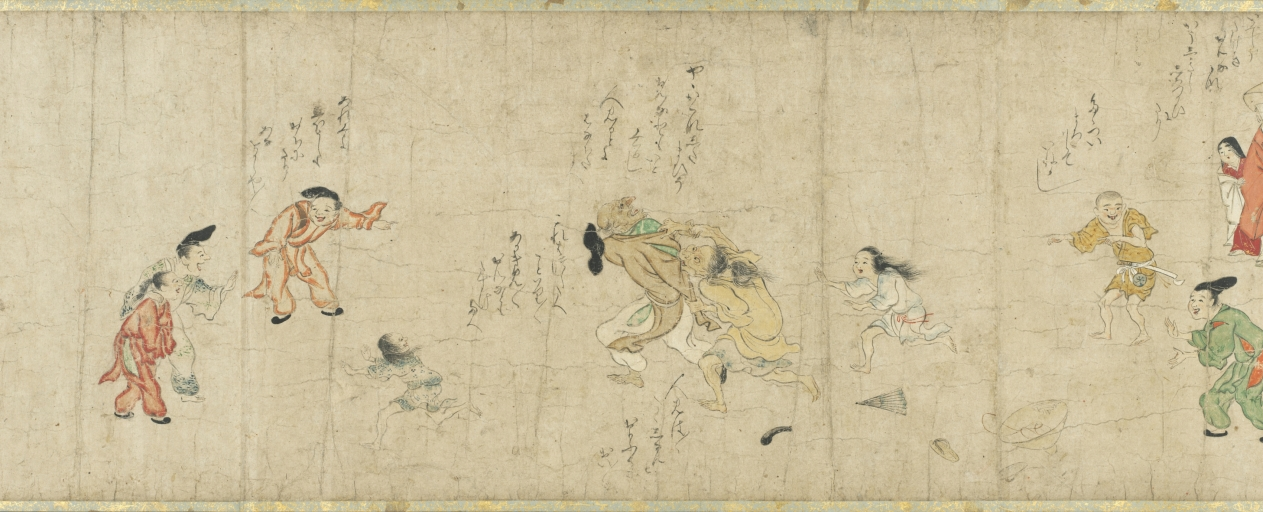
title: The Story of Fukutomi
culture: Japan, Muromachi period (1392–1573)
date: mid-1400s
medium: Handscroll; ink and color on paper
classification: Painting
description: This handscroll shows the second half of an odd tale in which a ne’er-do-well seeks the path to quick fortune and learns the art of musical flatulence. Prior to a major performance, a mentor (and competitor) advises him to consume morning glory seeds, a laxative. Thus, while performing he fouls himself and ends his days in humiliation. The audacious nature of this story and its presentation—well-animated figures with dialogue adjacent to the appropriate moments of action—create a primitive graphic novel. Japanese visual humor about farting preceded this story, but the satirical, mean-spirited twist in this tale suggests its intent was not merely to be humorous. The story was likely commissioned by court officials who disapproved of common performers rising to high positions, outflanking what was the accepted social order.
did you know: This scroll is treasured as the second oldest surviving version of this story.